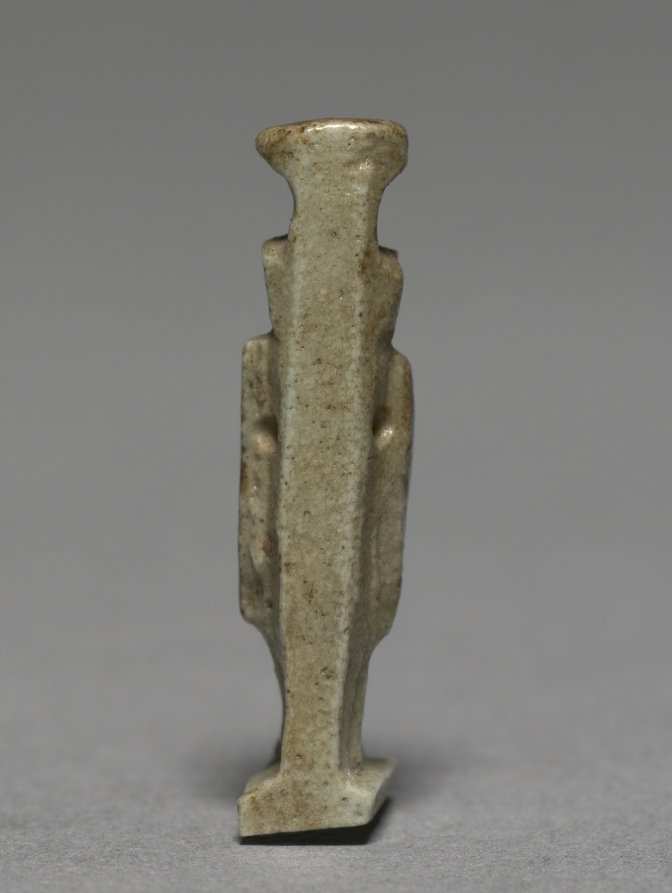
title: Amulet of Nephthys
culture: Egypt, Late period (715–332 BCE), Dynasty 30–Greco-Roman period (332 BCE–395 CE), Ptolemaic dynasty (305–30 BCE)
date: 380–30 BCE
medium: gray green faience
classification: Amulets